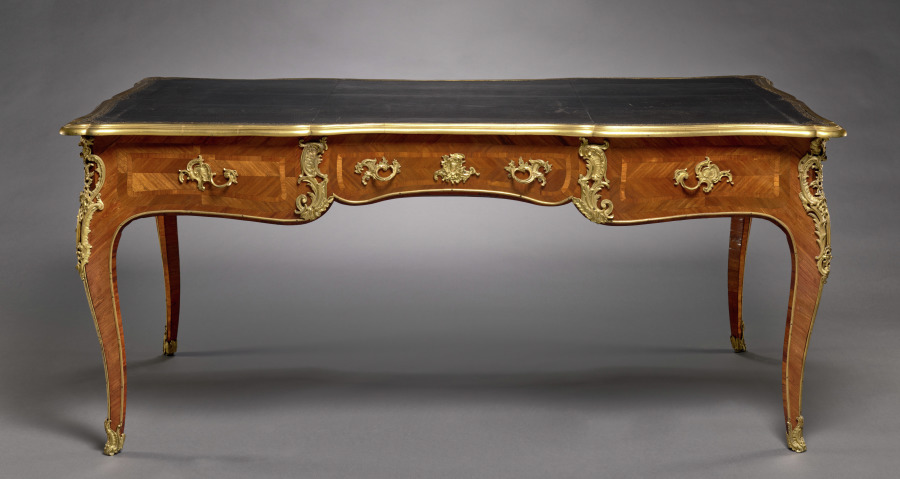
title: Table Desk (bureau plat)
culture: France, Paris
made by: Jacques Dubois (French, 1693–1763)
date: c. 1750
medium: wood marquetry with gilt bronze mounts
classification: Furniture and woodwork